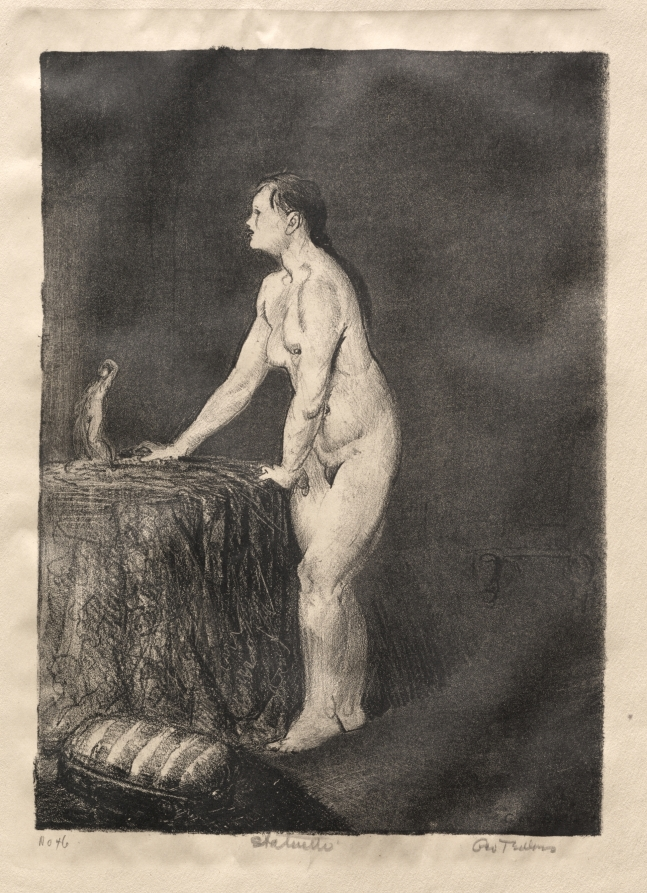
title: Statuette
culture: America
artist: George Bellows (American, 1882–1925)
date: 1917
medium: lithograph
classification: Print